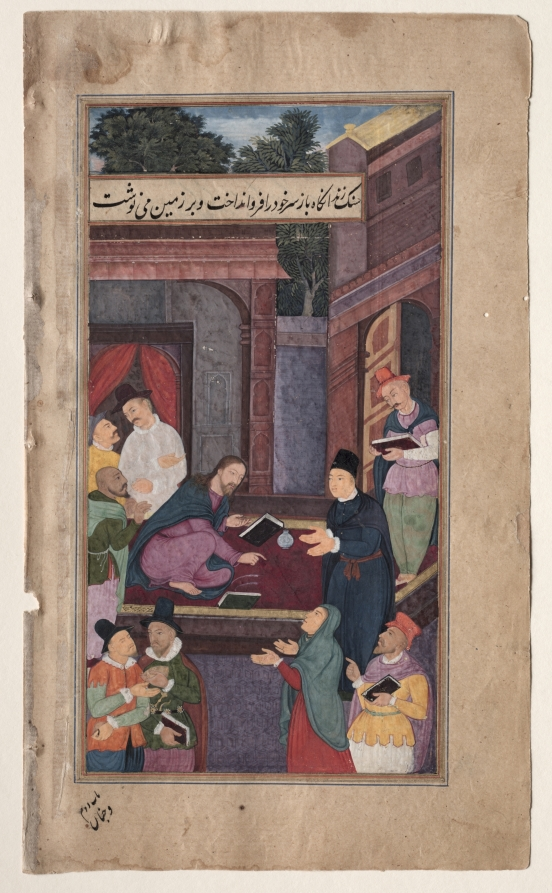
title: Jesus writes on the ground (folio 130 verso), from a Mirror of Holiness (Mir’at al-quds) of Father Jerome Xavier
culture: Mughal India, Allahabad, made for Prince Salim (1569–1627)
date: 1602–4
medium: Gum tempera, ink, color, and gold on paper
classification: Manuscript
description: As Jesus was debating with the scribes and Pharisees in Jerusalem, they brought before him an adulterous woman. Hoping to incite him to violence, they declared that if Jesus followed the law of Moses, he should order her to be stoned to death. Jesus responded, “Let whichever of you is without sin cast the first stone.” Then he began to write with his finger on the ground, and each of the men saw a description of his own sins. The two men in the bottom corner of the painting clutch stones with expressions of doubt, fear, and disgust. The adulteress in the red dress holds out her hands in supplication.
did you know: The adulteress wears a red dress, gold rings, and a necklace under her stole.